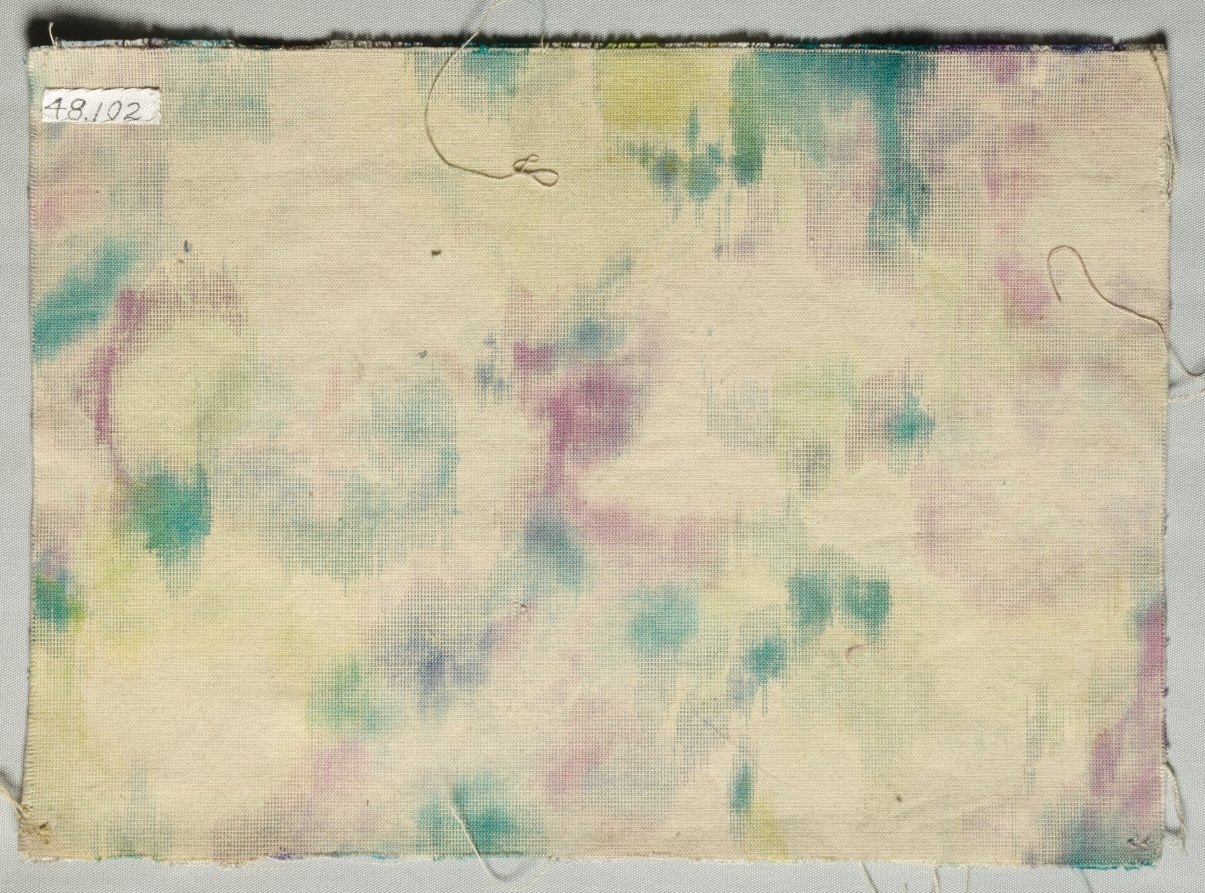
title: Stenciled Velvet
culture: America, New York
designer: Dorothy Marshall Hornblower (American, 1886–1968)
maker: Tiffany Studios (United States, New York, 1902–32)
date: c. 1902–10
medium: plain silk velvet stencilled with vegetable dyes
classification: Velvet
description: Textiles formed a large part of Louis Comfort Tiffany's artistic production, especially since he used many of them in his designs for artistic interiors. His clients included many society notables, institutions, churches, and even the White House. Tiffany employed many women artisans in his business, including Dorothy Marshall Hornblower, who oversaw the textile department and likely designed this ethereal Art Nouveau pattern.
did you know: This morning glory pattern stenciled velvet was likely used for drapery fabric.